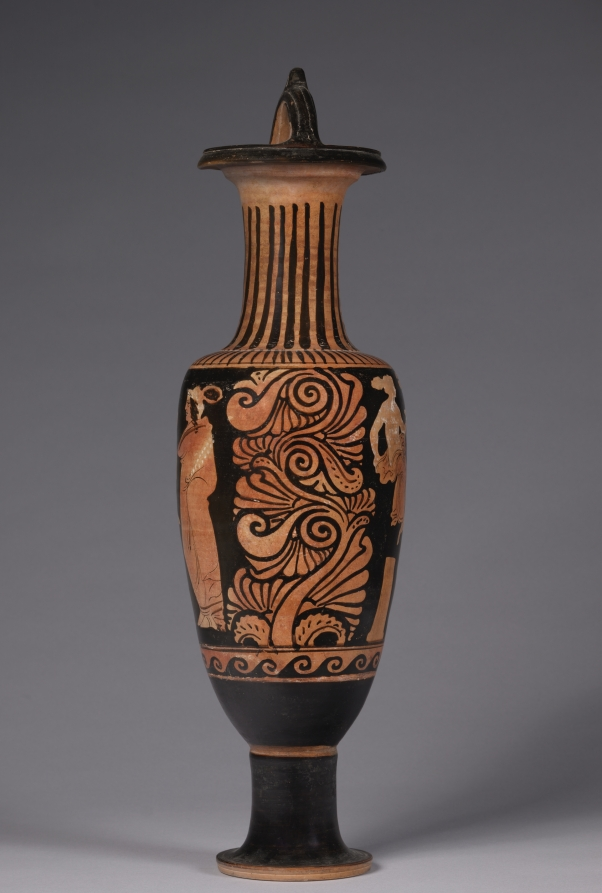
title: Red-Figure Bail Amphora (Storage Vessel): Draped Women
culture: South Italian, Campanian, Cumaean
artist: attributed to CA Painter, Walters Sub-group (South Italian, Campanian, active at Cumae, c. 350–320 BCE)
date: 330–320 BCE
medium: ceramic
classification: Ceramic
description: The bail amphora, named for the tall handle arching over the mouth, is a shape made primarily in Campania, where red-figure vases were produced at both Capua and Cumae in the 4th century BC. The anonymous painter of this vase is known as the CA Painter, for Cumae A, the first significant artist in this area. The seated and standing women on both sides of the vase, some only partially draped (and their white skin now largely lost), recall those on many of the painter’s other vases, as do the elaborate palmette patterns on either side.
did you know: This vase once belonged to the famous opera singer Evan Gorga.